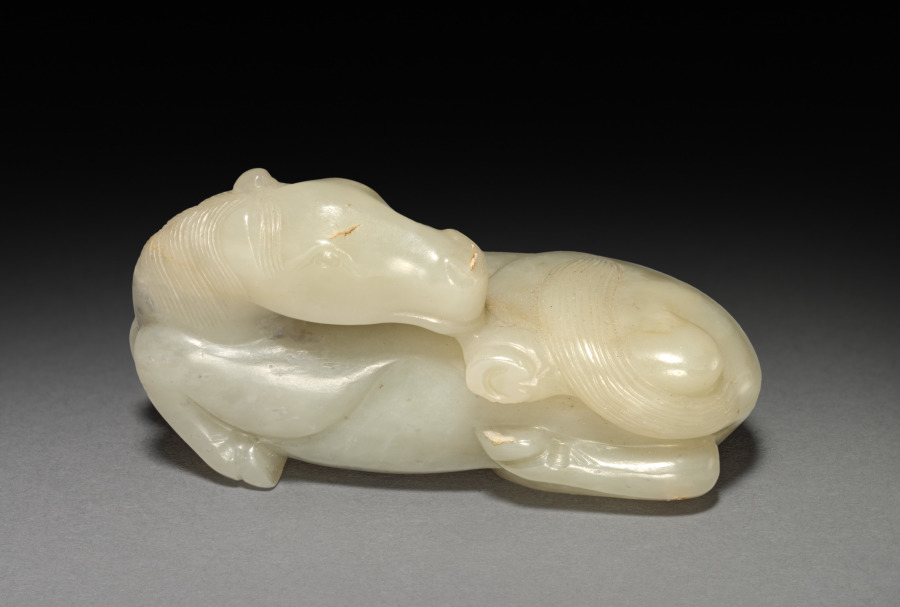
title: Horse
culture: China, Ming dynasty (1368-1644) - Qing dynasty (1644-1911)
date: 1600s or earlier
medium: jade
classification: Jade